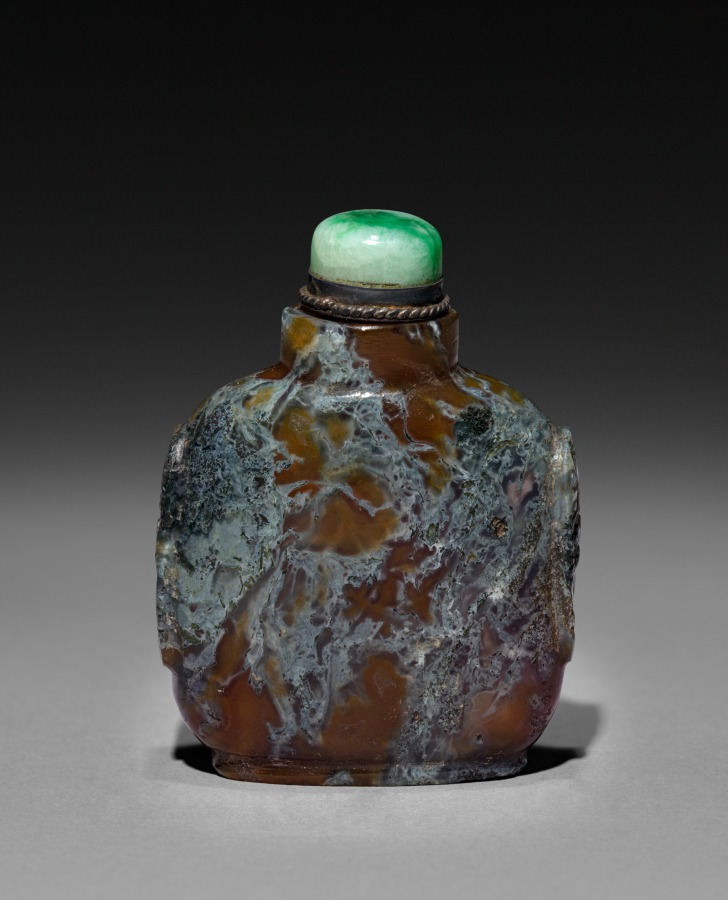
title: Snuff Bottle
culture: China, Qing dynasty (1644-1911)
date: 1644–1911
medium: glass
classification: Glass